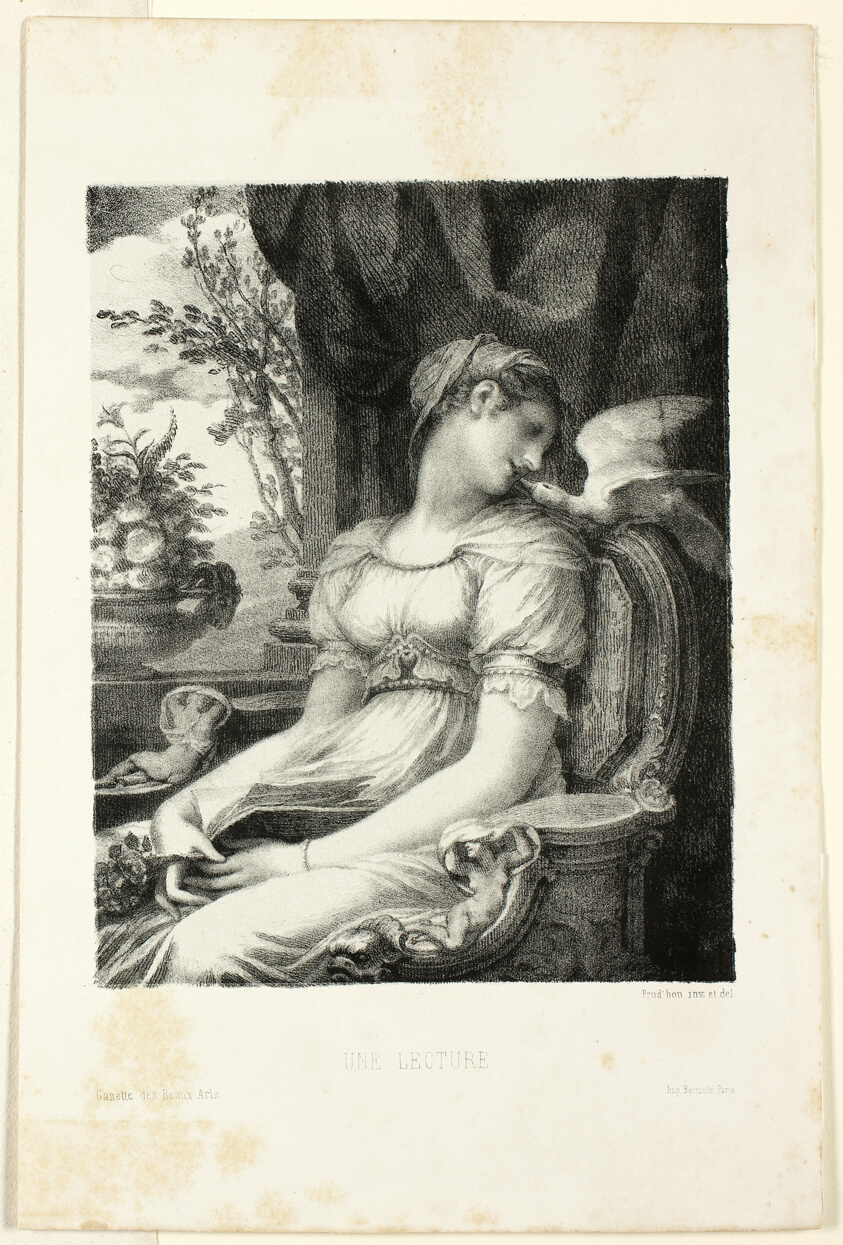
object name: Print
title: Une Lecture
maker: Pierre-Paul Prud'hon; French, 1758-1823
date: 1822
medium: Lithograph in black on paper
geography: France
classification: lithograph; print; prints and drawing